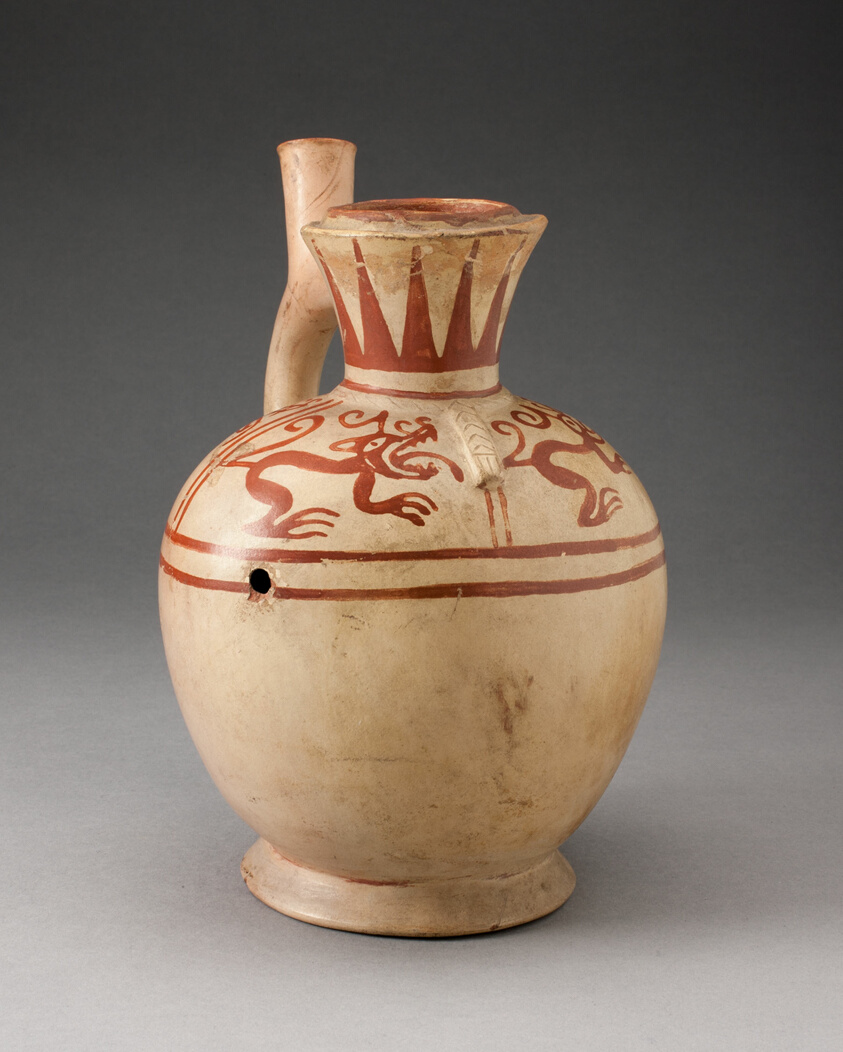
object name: Vessel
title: Handle Spout Jug with Quadruped Motifs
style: moche, Arts of the Americas, andes, south american, andean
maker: Moche (North coast, Peru)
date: 100 BCE–500 CE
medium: Ceramic and pigment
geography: Peruvian North Coast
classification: earthenware; ceramics; vessel; art of the americas